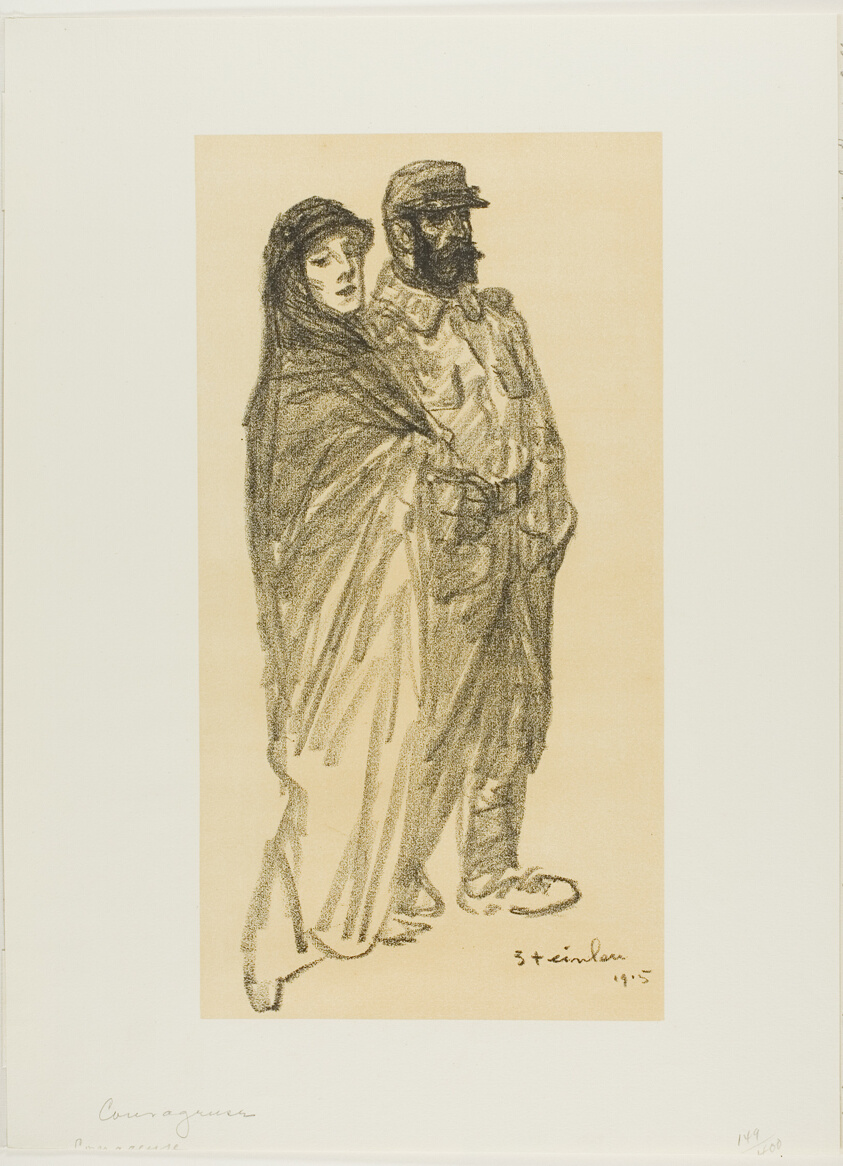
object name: Print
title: Courageous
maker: Théophile-Alexandre Steinlen; French, born Switzerland, 1859-1923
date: 1915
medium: Lithograph in black over fawn tint on thick off-white wove paper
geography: France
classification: lithograph; print; prints and drawing